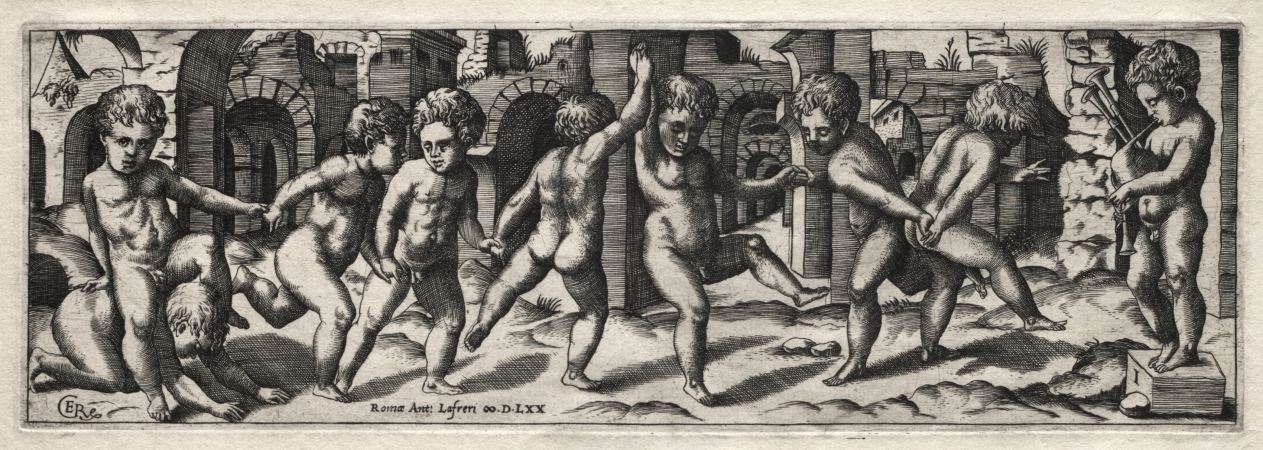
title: Frieze of Children Dancing to a Bag-pipe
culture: Italy, worked in France, 16th century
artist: Giorgio Reverdino (Italian, active c. 1531–1564/70)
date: mid-1500s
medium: engraving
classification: Print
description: Georges Reverdy (French, active 1529-1561) Frieze of Children Dancing to a Bagpipe, 1570 Engraving Gift of Leonard C. Hanna, Jr. 1928.771